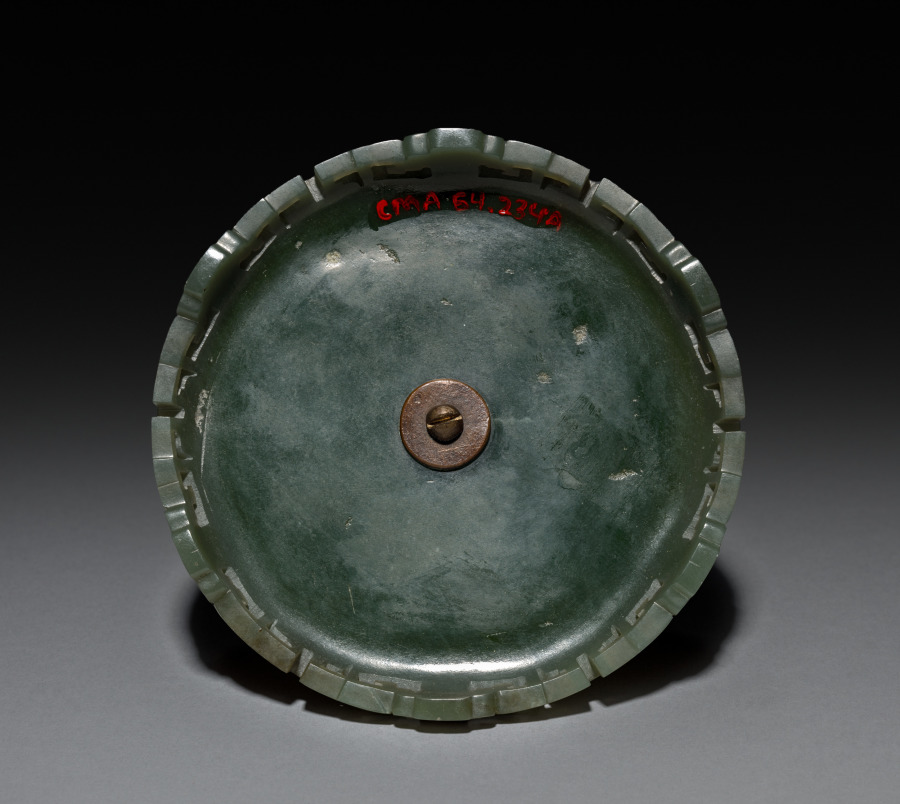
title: Cylinder (base)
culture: China, Qing dynasty (1644-1911) or Republican period (1912-49)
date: 1800–1940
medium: carved jade and gilt bronze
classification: Jade